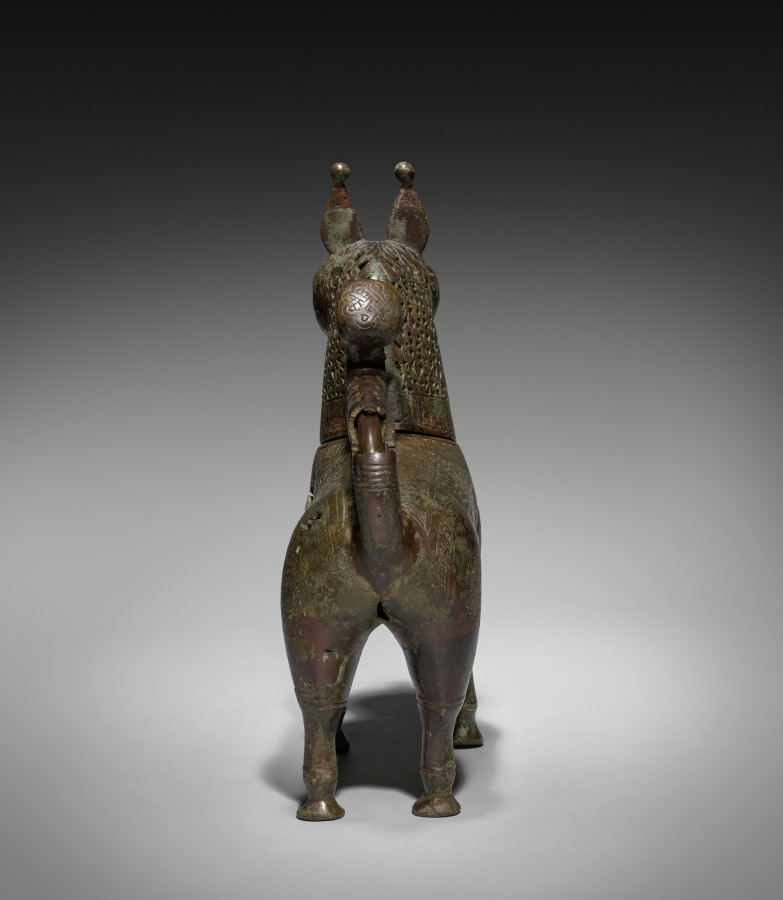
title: Feline Incense Burner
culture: Iran, Khurasan, Seljuq period of Iran (1037–1194)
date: 1150–1200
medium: Copper alloy, cast, engraved, chased, and pierced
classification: Metalwork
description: In Iran during the 1000s and 1100s, vessels in the shape of animals gained popularity, especially as incense burners. Felines were favored in Persian art and this piece may represent a caracal, a type of lynx. The head of the creature was cast separately and is removable to fill its body with hot coals and incense. Qur’anic verses on the neck and spine remind worshippers to set work aside, attend prayer, and then disperse to seek God’s bounty. The diffusion of perfumed smoke through the burner’s pierced palmette design may have served as a sensorial reminder of this teaching.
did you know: Arabic inscriptions in Kufic script against a background of scrolling arabesques run along the back and neck of the feline form.